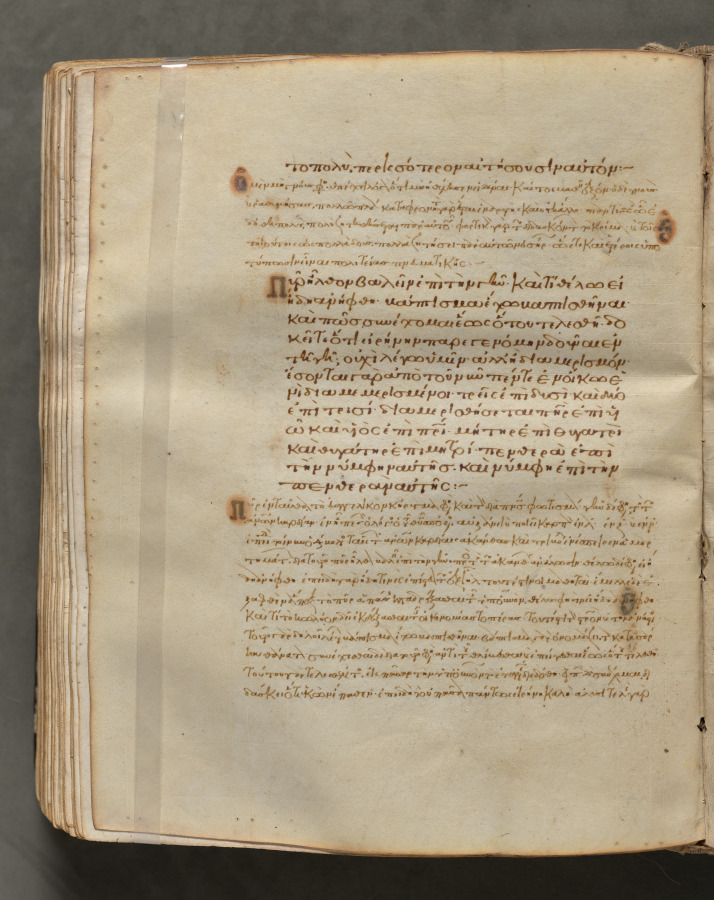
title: Text, folio 270 (verso), from a Gospel Book with Commentaries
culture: Byzantium, Constantinople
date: c. 1000–1100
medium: ink, tempera, and gold on vellum; leather binding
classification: Bound Volume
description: Each of the four gospels in this book opens on a page with brilliantly illuminated borders depicting the author of the text as well as birds—principally peacocks, symbols of the immortality of the soul—and fountains, representing the fountain of life and the salvation of the soul. This volume consists of 428 leaves with texts in Greek. Its level of sophistication suggests that it was probably written and decorated in a monastery in Constantinople.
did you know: Gospel books were carried in procession through Byzantine churches.